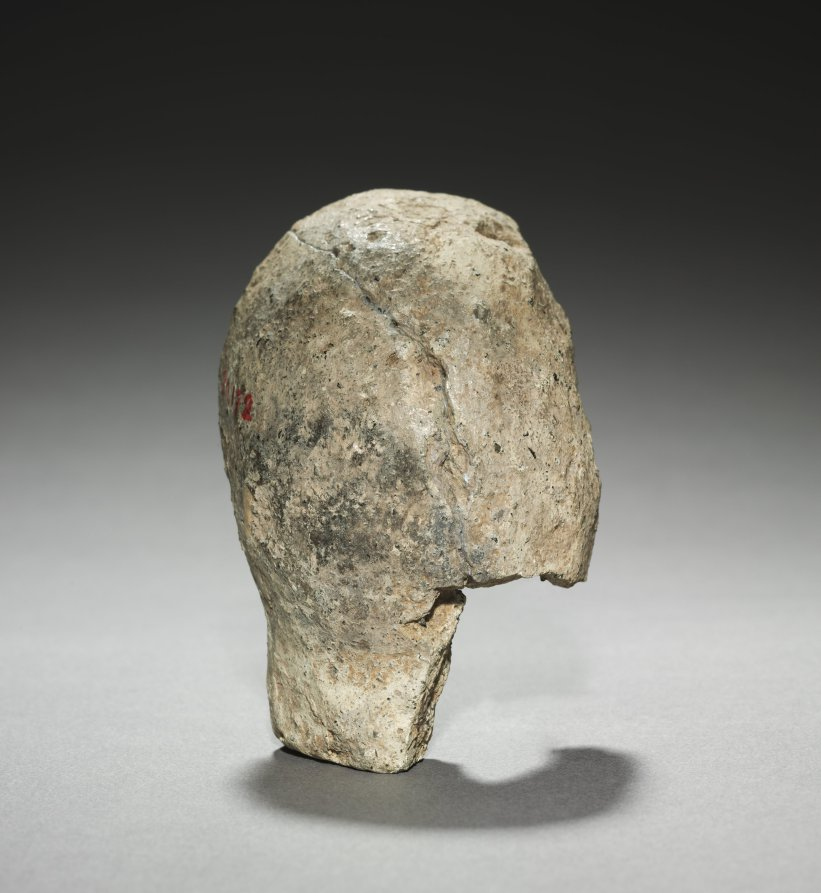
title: Mold for a Male Head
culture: Italy, Roman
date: 1–300 CE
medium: terracotta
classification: Sculpture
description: Now cracked and fragmentary, this terracotta mold would have been used to produce a male head, also of terracotta. Modern impressions, whether made physically (with clay or other material) or digitally, can approximate the appearance of ancient objects made with this mold, albeit without added pigment. Separate molds may have been used to create a back for the head, and perhaps a body as well.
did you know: Because this is a mold, its facial features would be reversed in the final product.